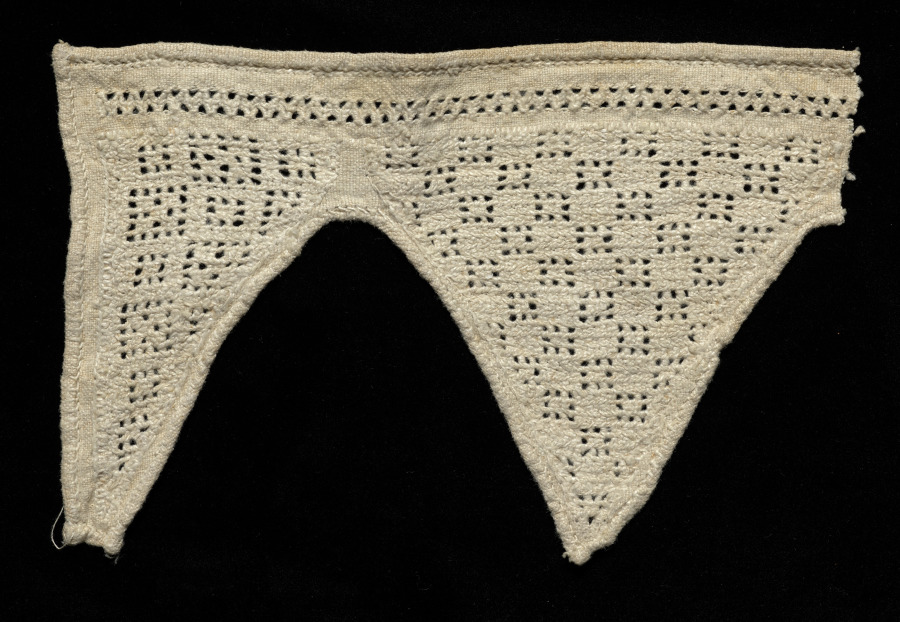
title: Fragment of a Collar(?)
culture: Spain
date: 1600s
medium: Linen: needle lace (drawnwork)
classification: Lace